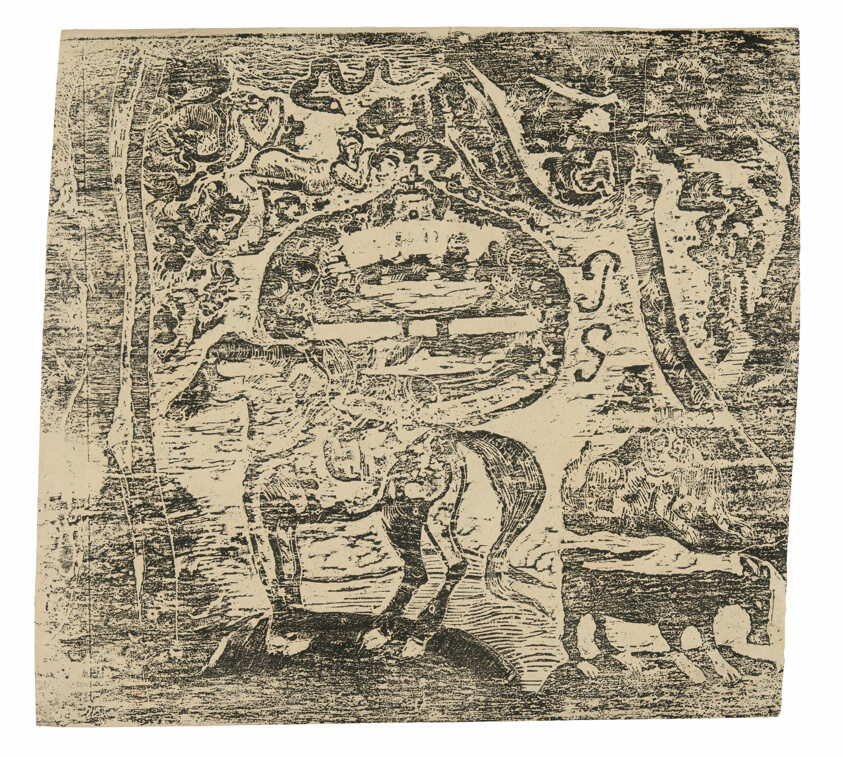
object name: Print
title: Horse, with Other Animals and Ornaments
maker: Paul Gauguin (French, 1848-1903)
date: 1899/1900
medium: Wood-block print in black ink on cream wove paper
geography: France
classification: woodcut; print; prints and drawing